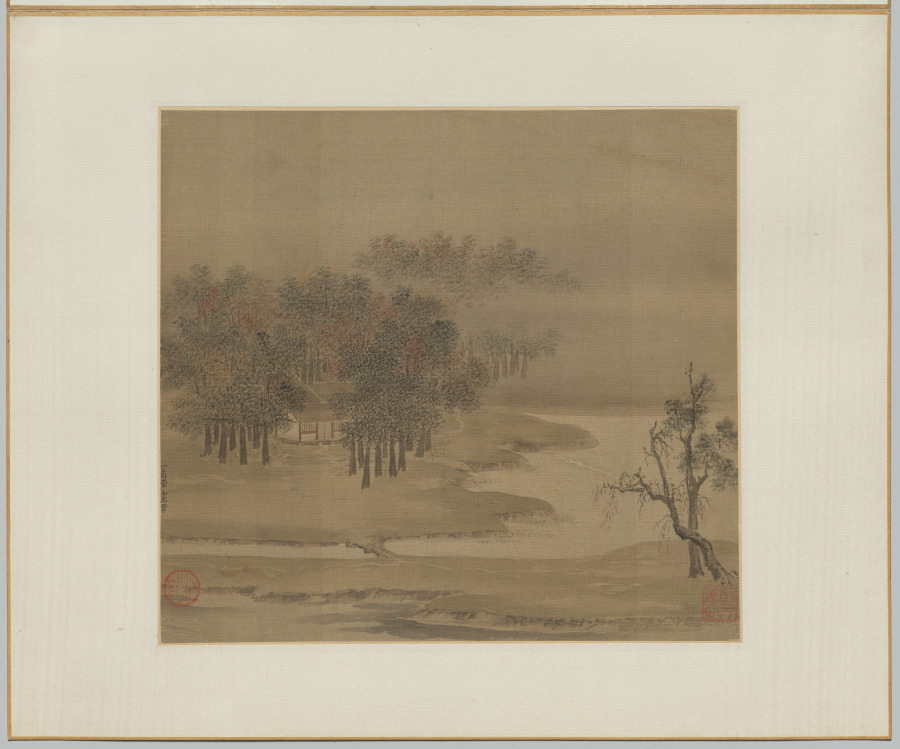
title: Cottages in a Misty Grove in Autumn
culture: China, Northern Song dynasty (960-1127)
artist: Li Anzhong (Chinese, active first half of the 1100s)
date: 1117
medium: Album leaf; ink and color on silk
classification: Painting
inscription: Artist's inscription: In the ting-yu year [1117], Li An-chung painted. 2 seals of Wu T'ing (ca. 1600).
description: This leaf is an early example of a new mode in landscape painting expressed in vistas of water-rich scenery that developed since the 900s. Li Anzhong, a court artist during the 1100s, witnessed the transition of the capital from Kaifeng across the Yangzi River to Hangzhou.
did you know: This painting showcases a delicate painting technique and an intimate view.